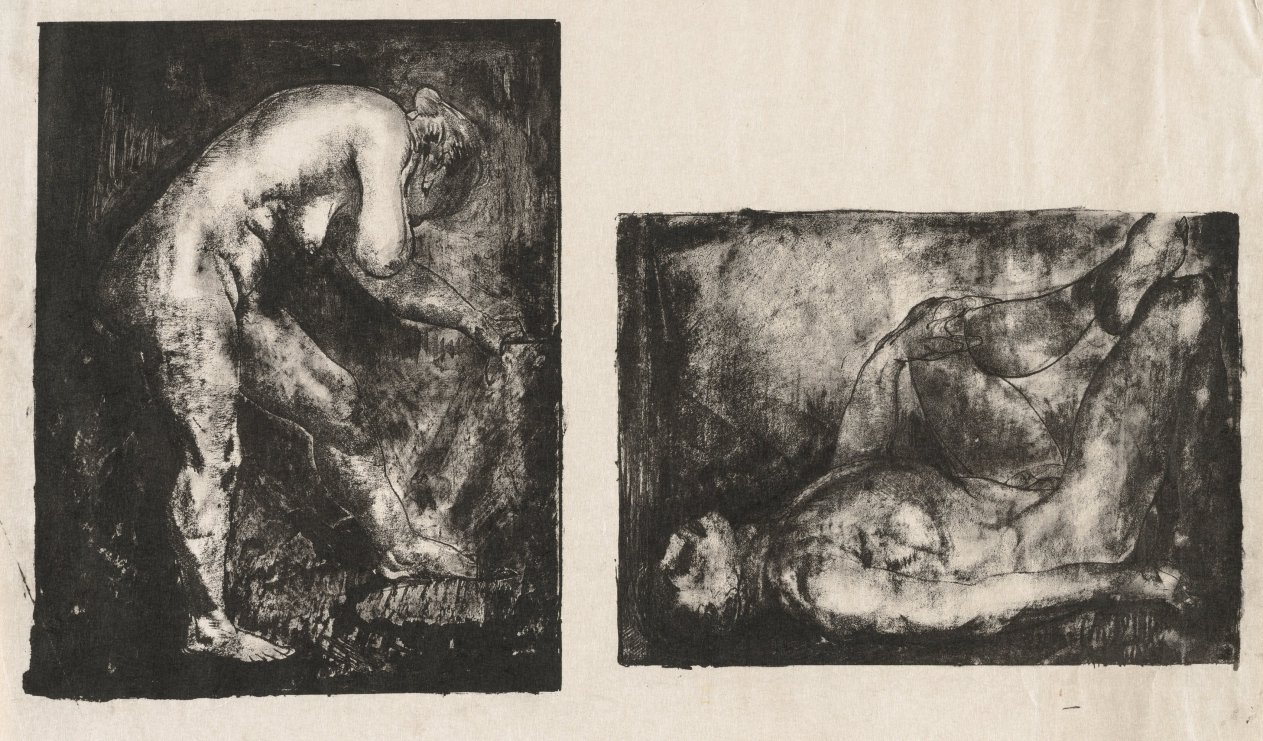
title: Standing Nude Bending Forward, third state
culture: America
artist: George Bellows (American, 1882–1925)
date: 1916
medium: lithograph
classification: Print